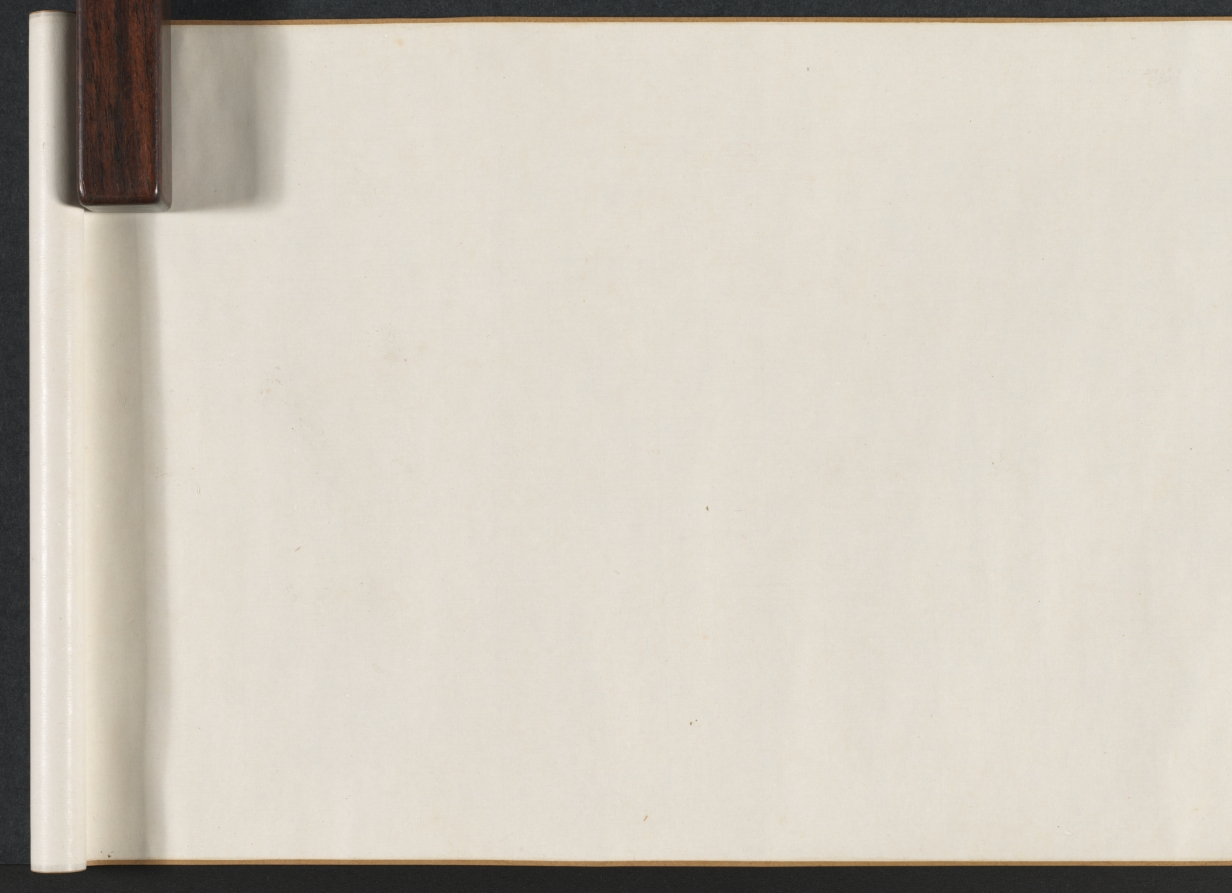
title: The Nine Elders of the Mountain of Fragrance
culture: China, Ming dynasty (1368–1644)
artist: attributed to Xie Huan (Chinese, c. 1370-c.1450)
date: 1426–52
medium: handscroll, ink and color on silk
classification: Painting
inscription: 4 seals: 2 of Xiang Yuanbian 項元汴 (1525–1590); 1 of the Qianlong Emperor (r. 1736-95); 1 of C. C. Wang 王季遷 (1907–2003)